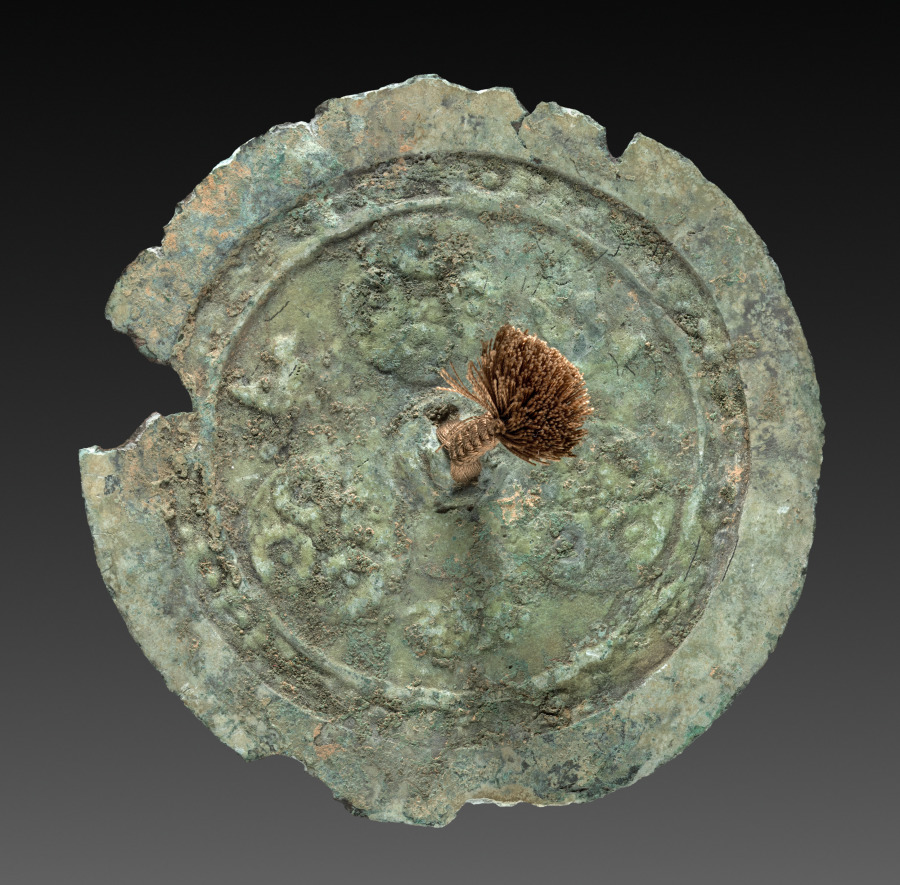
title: Mirror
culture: Japan, Heian period (794–1185)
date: 794–1185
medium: bronze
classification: Metalwork